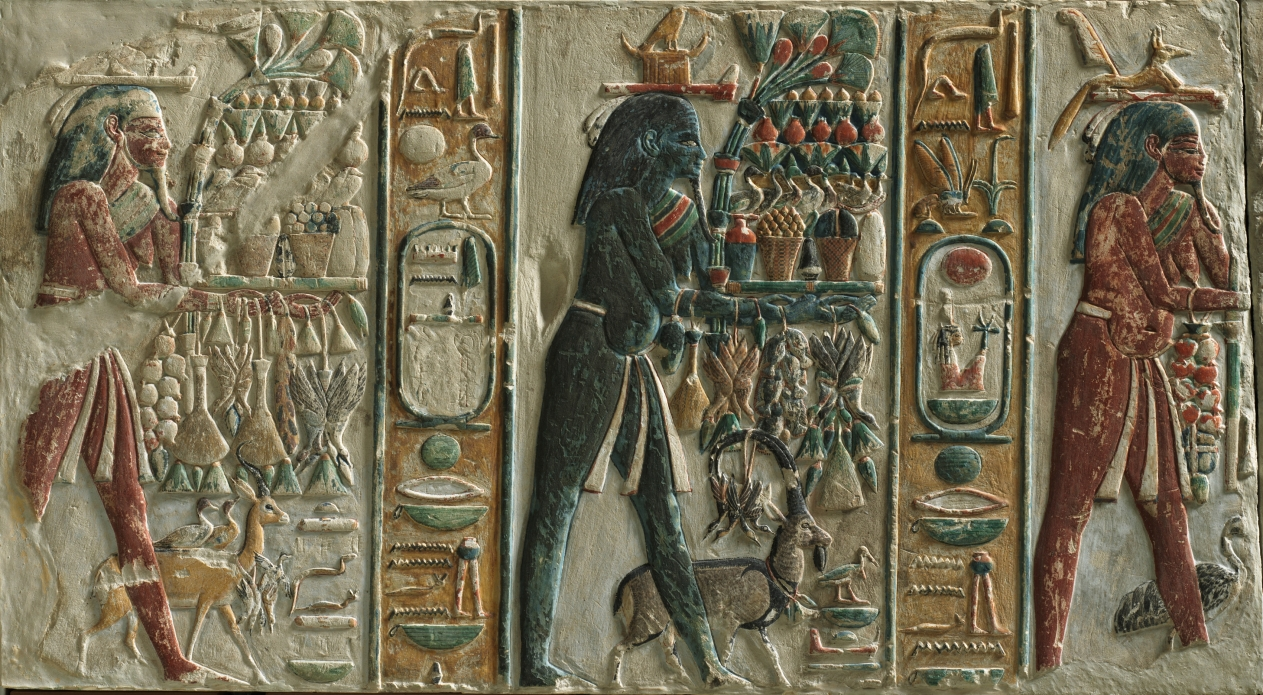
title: Nome Gods Bearing Offerings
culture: Egypt, New Kingdom (1540–1069 BCE), Dynasty 18, reign of Amenhotep III (1390–1352 BCE)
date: c. 1391–1353 BCE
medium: painted limestone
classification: Sculpture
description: These blocks from a temple wall show four figures identified as nomes, or provinces, of ancient Egypt. Carrying trays heaped with offerings and leading sacrificial animals, they personify the bounty of the land that they bring to the god who stood in the upper register, facing a figure of the king, Amenhotep III. These blocks may be from Amenhotep III's temple, dedicated to the god Horus.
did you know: Another block from the same temple wall was acquired 15 years later by the museum.